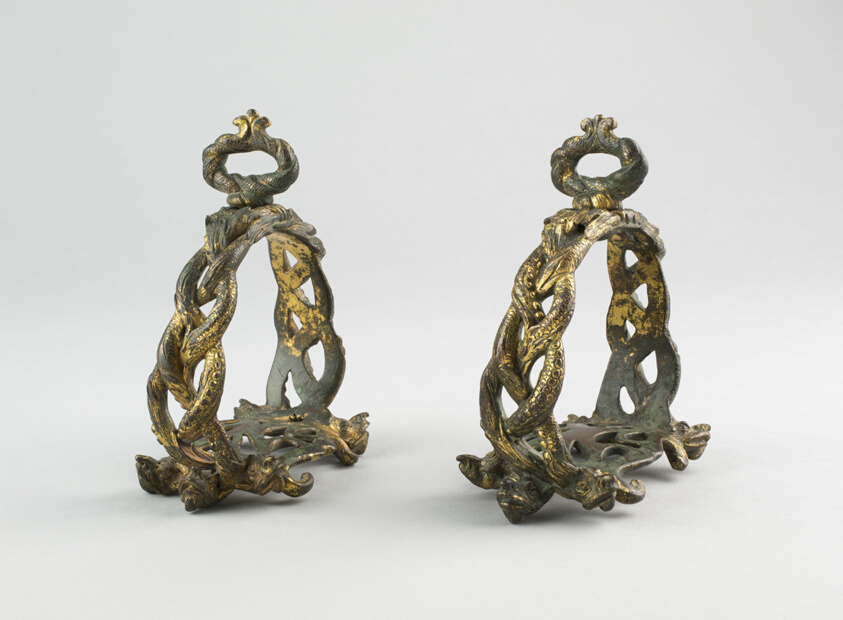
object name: Armor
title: Pair of Stirrups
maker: Spanish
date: 17th/18th century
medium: Gilt bronze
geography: Spain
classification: horse equipment; armor; arms and armor